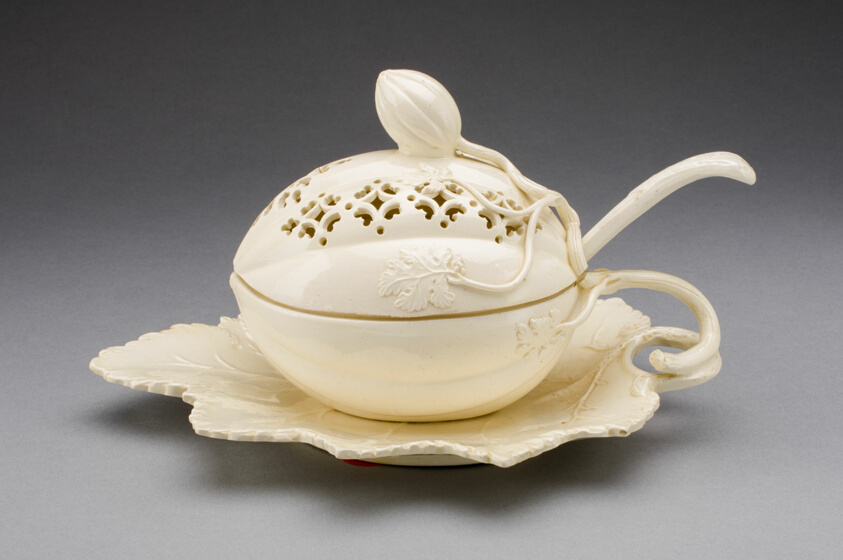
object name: Ceramics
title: Tureen and Stand with Ladle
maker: Leeds Pottery; English, founded 1756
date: 1780/90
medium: Lead-glazed earthenware (creamware)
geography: Yorkshire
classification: earthenware; ceramics; creamware; european decorative arts; lead-glazed earthenware